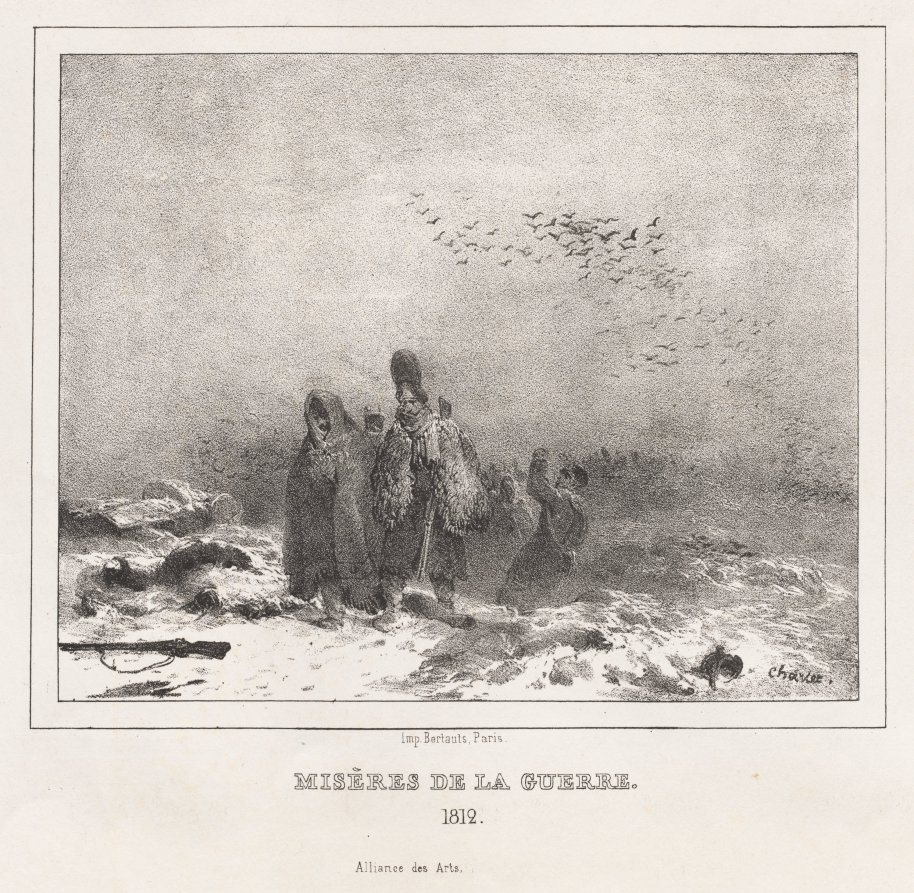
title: Moral and Philosophical Alphabet for the Use of Little and Big Children: Miseries of War (1812)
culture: France, 19th century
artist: Nicolas Toussaint Charlet (French, 1792–1845)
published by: Bertaut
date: 1812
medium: lithograph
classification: Print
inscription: in pencil, lower right: "855" / "Alphabet Moral 1835"